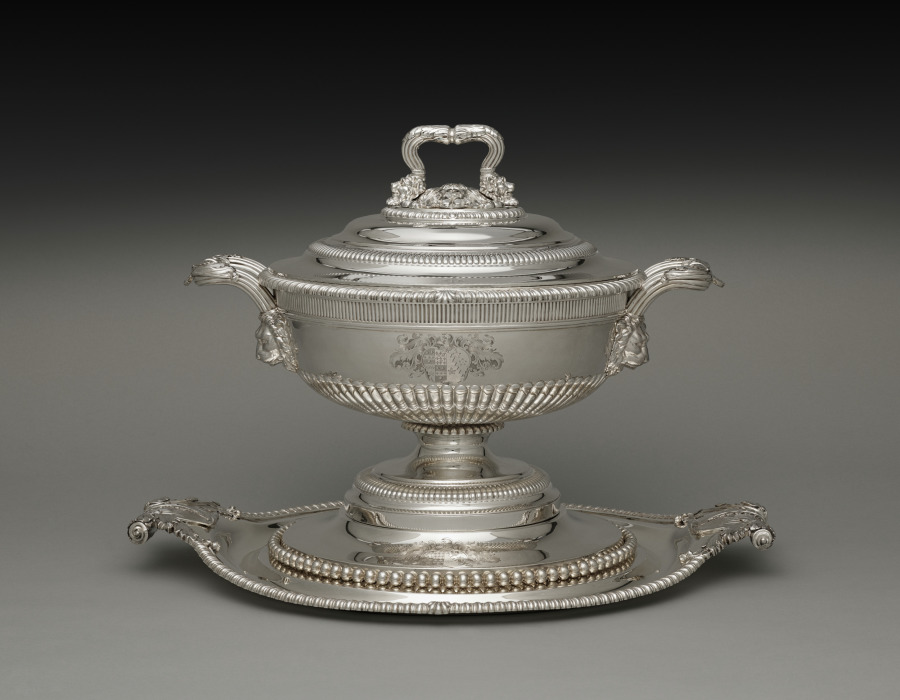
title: Covered Tureen on Stand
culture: England, London, 19th century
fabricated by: Paul Storr (British, 1771–1844)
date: 1812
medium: silver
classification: Silver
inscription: Coat of arms: Hutton impaling Chaytor; crest: Hutton. (Arms of Timothy Hutton (1779-1863) of Marske and Clifton Castle, Yorkshire, and his wife Elizabeth Chaytor of Spennithorne Hall, who were married in 1804.)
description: Silver fulfilled a prominent role in projecting wealth, status, power, and ritual in British life during the 1600s and 1700s. Elaborate forms such as this tureen, with its lionhead finials, acanthus leaves, and fluted detailing, not only represented wealth in its sheer silver weight but also provided royal and aristocratic owners a surface for displaying engraved coats of arms. The arms of the High Sheriff of Yorkshire, Timothy Hutton and his wife Elizabeth Chaytor of Spennithorne Hall in northern England are engraved on this tureen and stand by Paul Storr, one of the most prominent London silversmiths of the period.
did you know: While the word “tureen” was derived from the Latin word terrine, the name has also long been associated with the Marshal of France, Vicomte de Turenne (1611–1675), who according to legend once drank soup from his helmet.